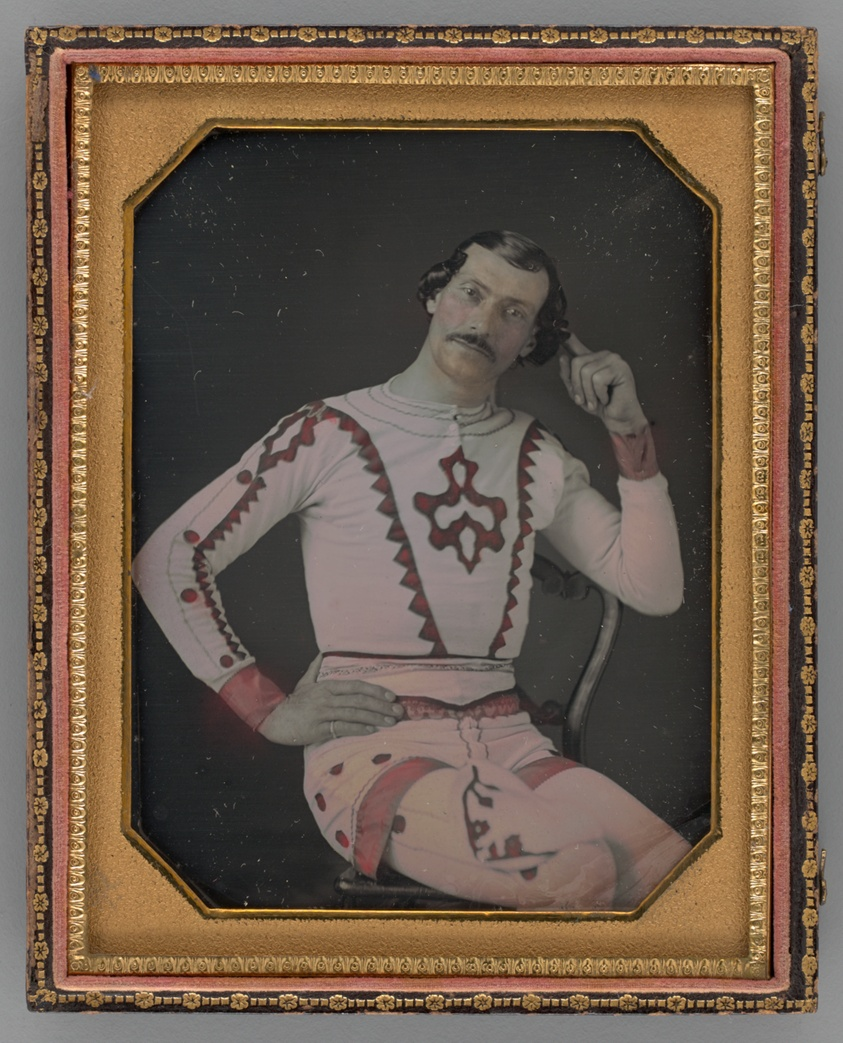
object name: Photograph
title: Untitled (Portrait of William G. Worrell of Welch’s National Circus)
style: 19th century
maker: Unknown maker; American, 19th century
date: 1855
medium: Daguerreotype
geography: United States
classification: portrait; daguerreotype; portrait; photograph; photographic process; photography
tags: lundberg collection, Male, men, circuses, clowns, portraits: male subject, portraits, portrait